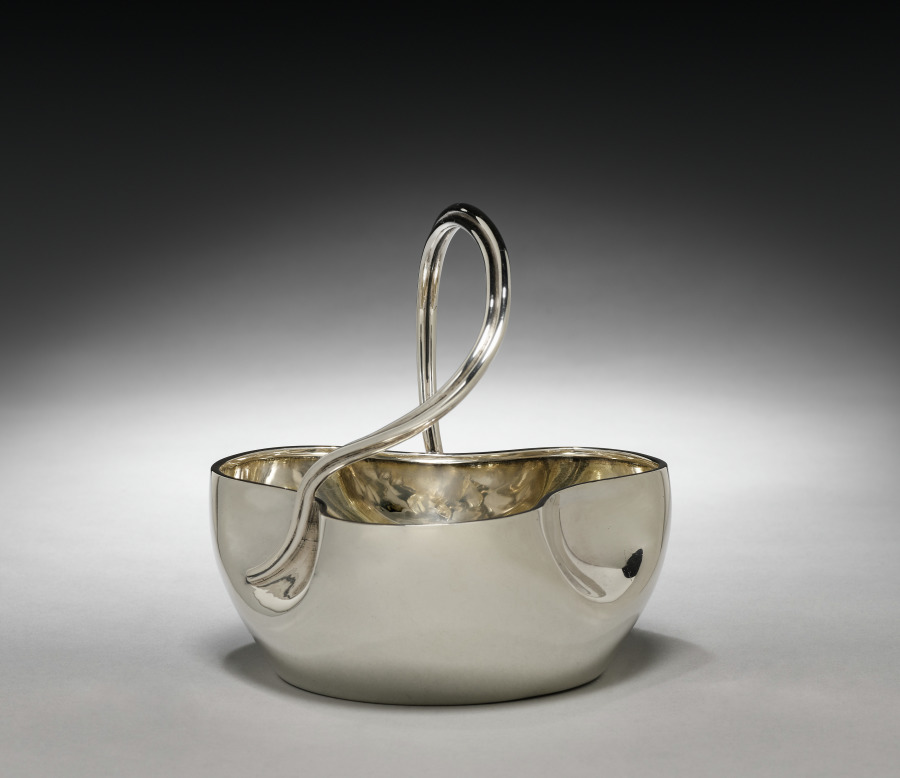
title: Bowl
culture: Russia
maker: House of Fabergé (Russian, 1842–1918)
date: 1895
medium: silver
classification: Silver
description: While Fabergé mainly produced objects with historicist ornamentation drawing upon earlier periods, the firm was also attentive to the latest fashions in the European decorative arts. This silver bowl is executed in the Art Nouveau style popular at the time. Its indented body and the asymmetrical handle convey a sense of liquid movement, accentuated by the undulating reflections on the silver surface.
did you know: The size suggests that it was used either for sweets or simply displayed for its aesthetic value.